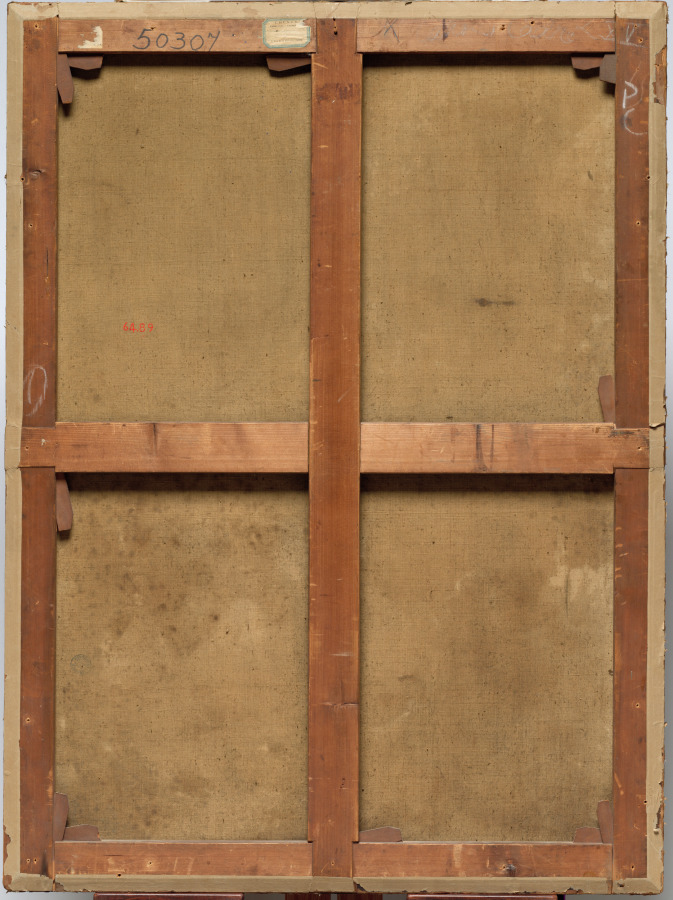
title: Portrait of Jean-Gabriel du Theil at the Signing of the Treaty of Vienna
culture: France, 18th century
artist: Jacques André Joseph Aved (French, 1702–1766)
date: 1738–40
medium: oil on canvas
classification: Painting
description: As secretary of foreign affairs for Louis XV of France, Jean-Gabriel du Theil (1685–1755) helped negotiate the 1738 Treaty of Vienna, which ceded the Duchy of Lorraine to France. The seal du Theil holds in his hand, the silver-gilt writing set, and the thick document all allude to these negotiations, while the wisp of smoke rising from the candle used to melt the sealing wax suggests that the treaty has only just concluded. Du Thiel’s relaxed posture conveys calm assurance, but his sharp gaze is that of a shrewd negotiator. A costume encrusted with gold embroidery and (just visible at his chest) the pink ribbon and star of the royal Order of Saint Lazarus, are visible manifestations of du Theil’s prestigious position.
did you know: Smoke rising from the candle suggests that du Theil has just added his molten wax seal to the document before him.